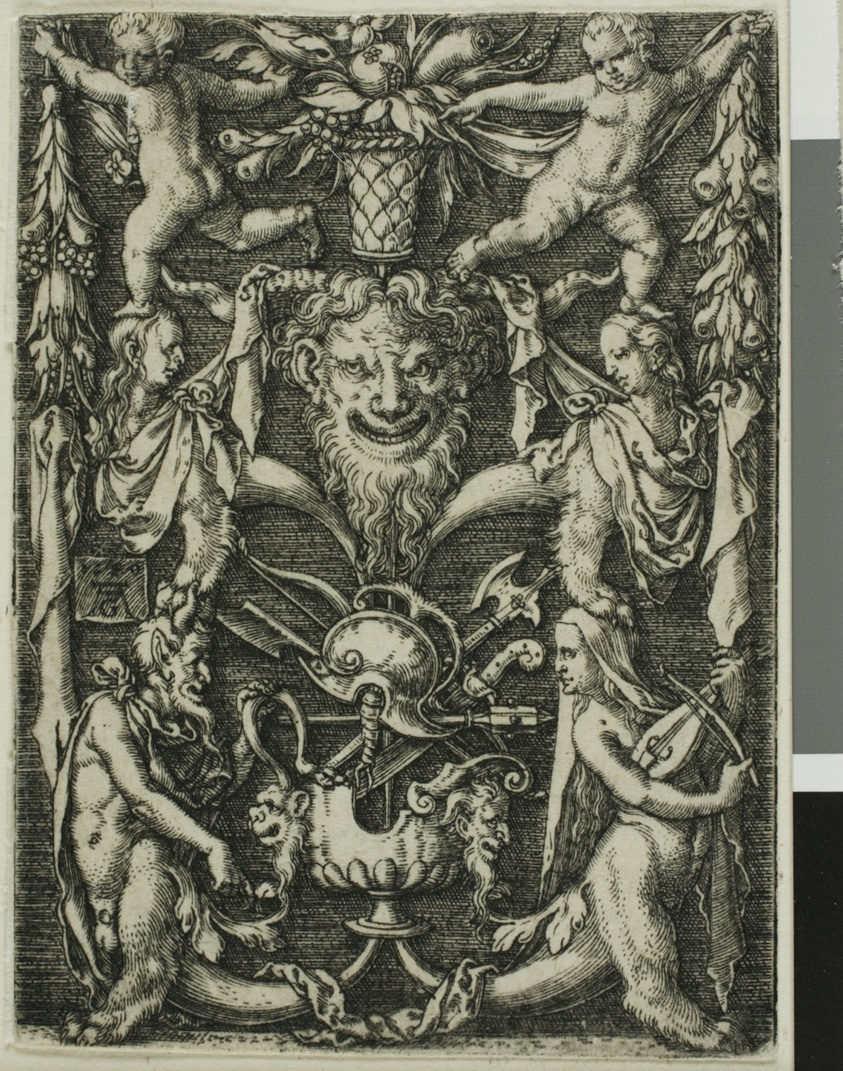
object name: Print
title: Ornamental Design with a Couple of Satyrs, Children and a Trophy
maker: Heinrich Aldegrever (German, 1502-c.1560)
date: 1550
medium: Engraving in black on ivory laid paper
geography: Germany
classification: engraving; print; prints and drawing